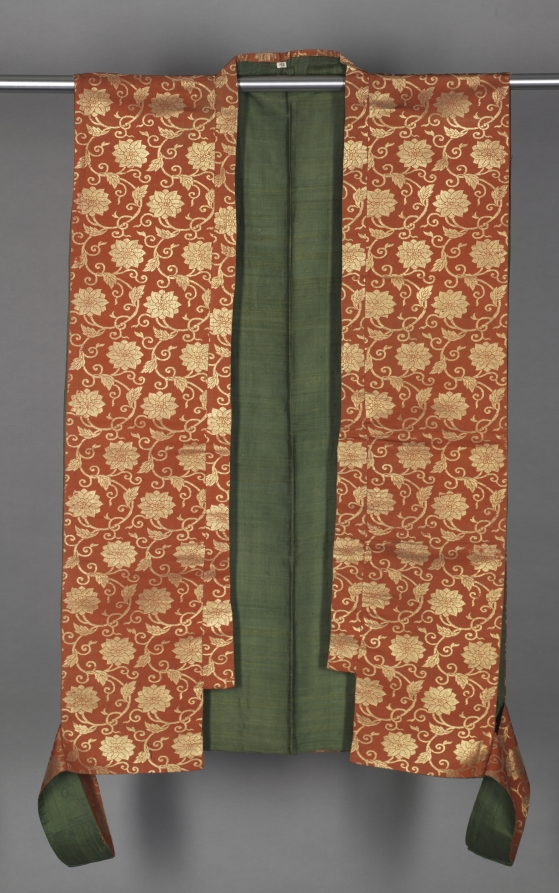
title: Noh Costume (Sobatsugi) with Peonies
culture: Japan, Edo period (1615–1868)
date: 1800–1850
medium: brocade; silk and metal thread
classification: Garment